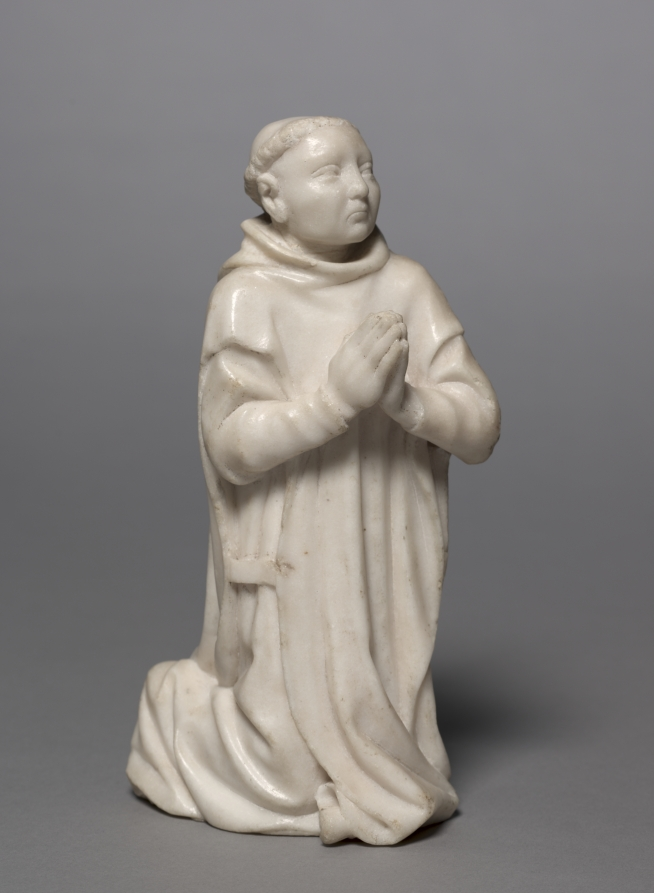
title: Kneeling Carthusian Monk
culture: France, Burgundy, Dijon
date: c. 1380–1400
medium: marble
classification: Sculpture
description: These are the only known surviving sculpted examples of kneeling Carthusian monks. Depictions of Carthusians in the same act of piety are found in paintings such as the one in this room from the Chartreuse de Champmol. These two figures are believed to come from the same Carthusian monastery as the mourners displayed nearby and would have formed part of a private devotional group, probably in a monk’s cell, with a sculpture of the crucified Christ or the Virgin positioned between them. They wear the recognizable white scapular, a hooded garment with front and back panels tied together with a tab.